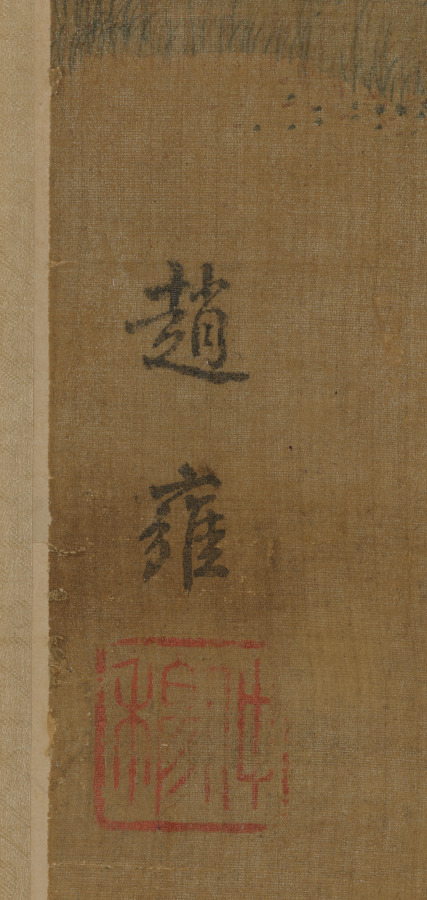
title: Hunting on Horses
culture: China, Ming dynasty (1368-1644) - Qing dynasty (1644-1911)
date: c. 1600s–1700s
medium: Hanging scroll; ink and color on silk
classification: Painting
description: This large-scale hanging scroll depicts a party hunting for waterfowl along a riverbank in the springtime. The leader is distinguished from the other five mounted hunters by his purple robe with golden dragon patterns and his white horse with a red tassel. He and his horse maintain still, dignified postures as a small white falcon captures one of the wild geese. Equestrian pursuits and hunting were particularly popular among the Khitan (also spelled “Qidan”) and Jurchen, ethnic groups who lived along China’s northeastern border. Their nomadic lifestyle intrigued the Chinese court and inspired Chinese artists to develop a painting genre showing them hunting.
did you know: This falconry scene includes one white hunting dog and four trained hunting birds.